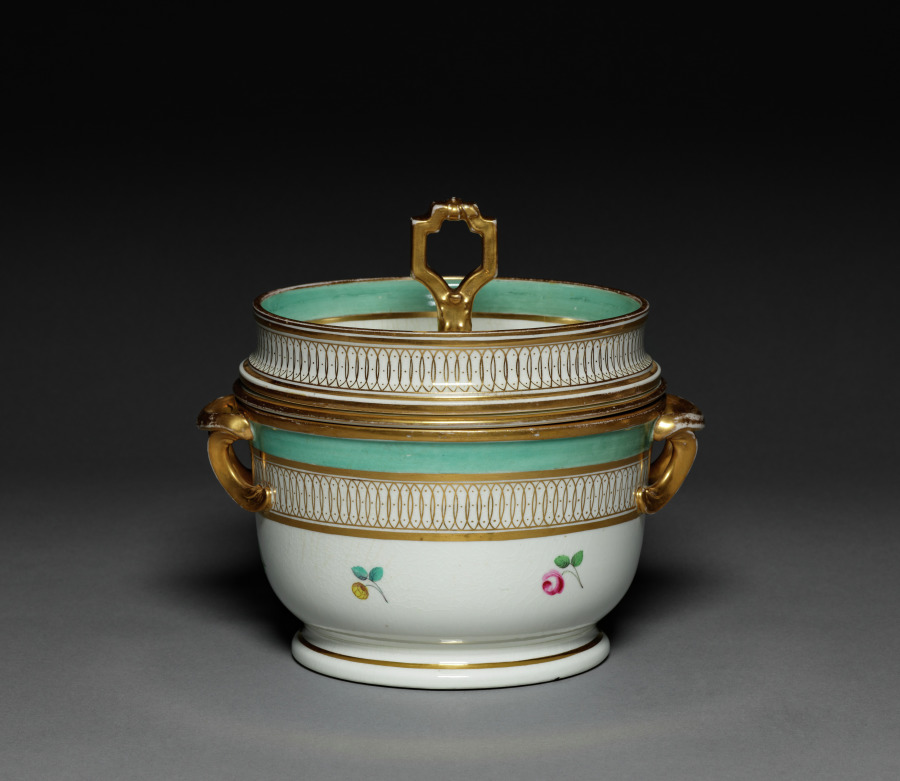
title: Ice Pail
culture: England, Derby, 18th-19th century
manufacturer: Derby (Crown Derby Period) (British)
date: c. 1795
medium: porcelain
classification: Ceramic